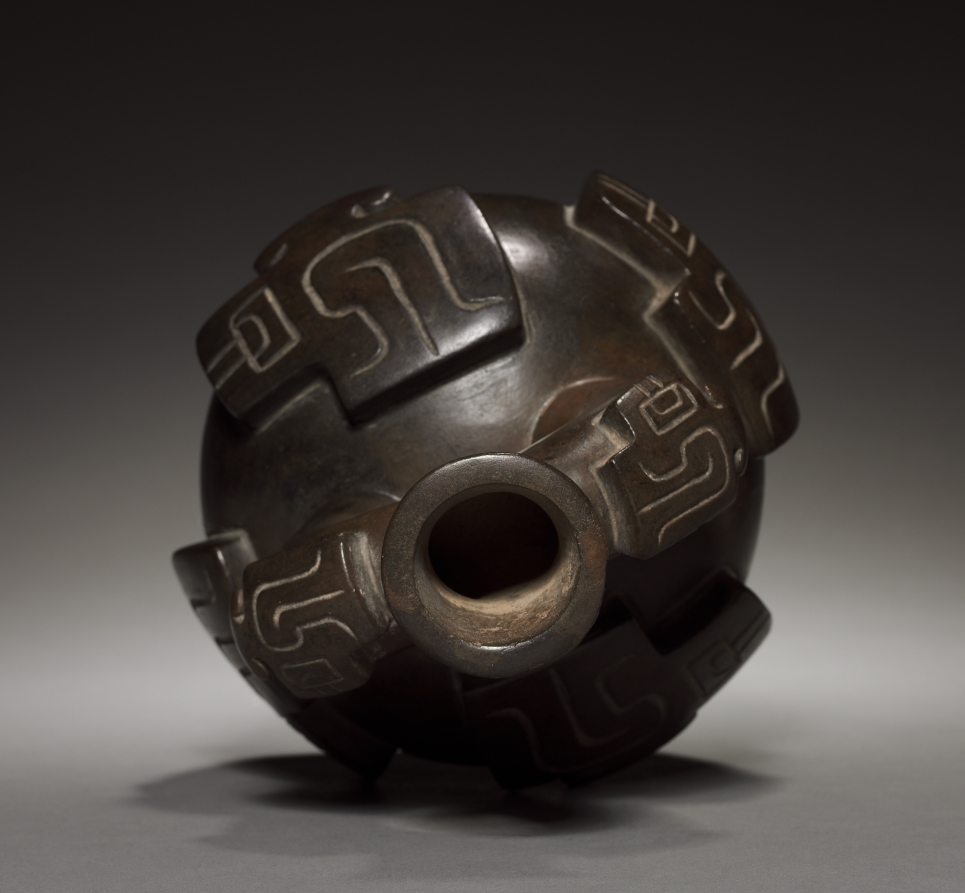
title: Vessel with Stirrup Spout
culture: Peru, likely modern, inspired by the Cupisnique style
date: 1900s (thermoluminescence date)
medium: earthenware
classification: Ceramic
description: The stirrup spout first appeared on the North Coast in the ceramics of the Cupisnique culture, a Chavín contemporary, and remained an important North Coast spout form until the time of the Spanish conquest. It probably had symbolic meaning, now lost.